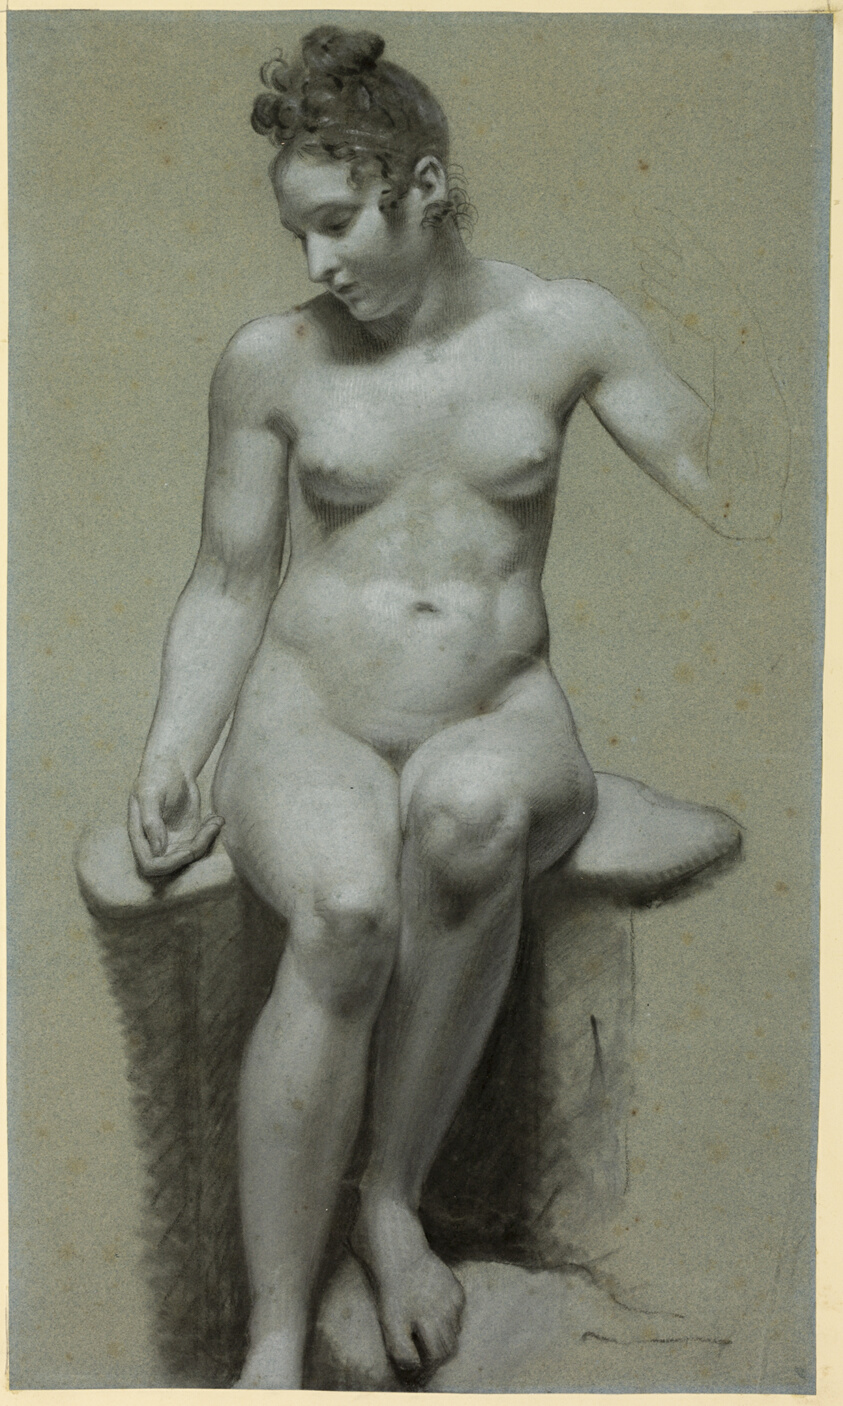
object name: Drawing and Watercolor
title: Seated Female Nude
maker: Pierre-Paul Prud'hon; French, 1758-1823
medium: Black and white chalks, with stumping, on blue laid paper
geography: France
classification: chalk; drawings (visual works); prints and drawing